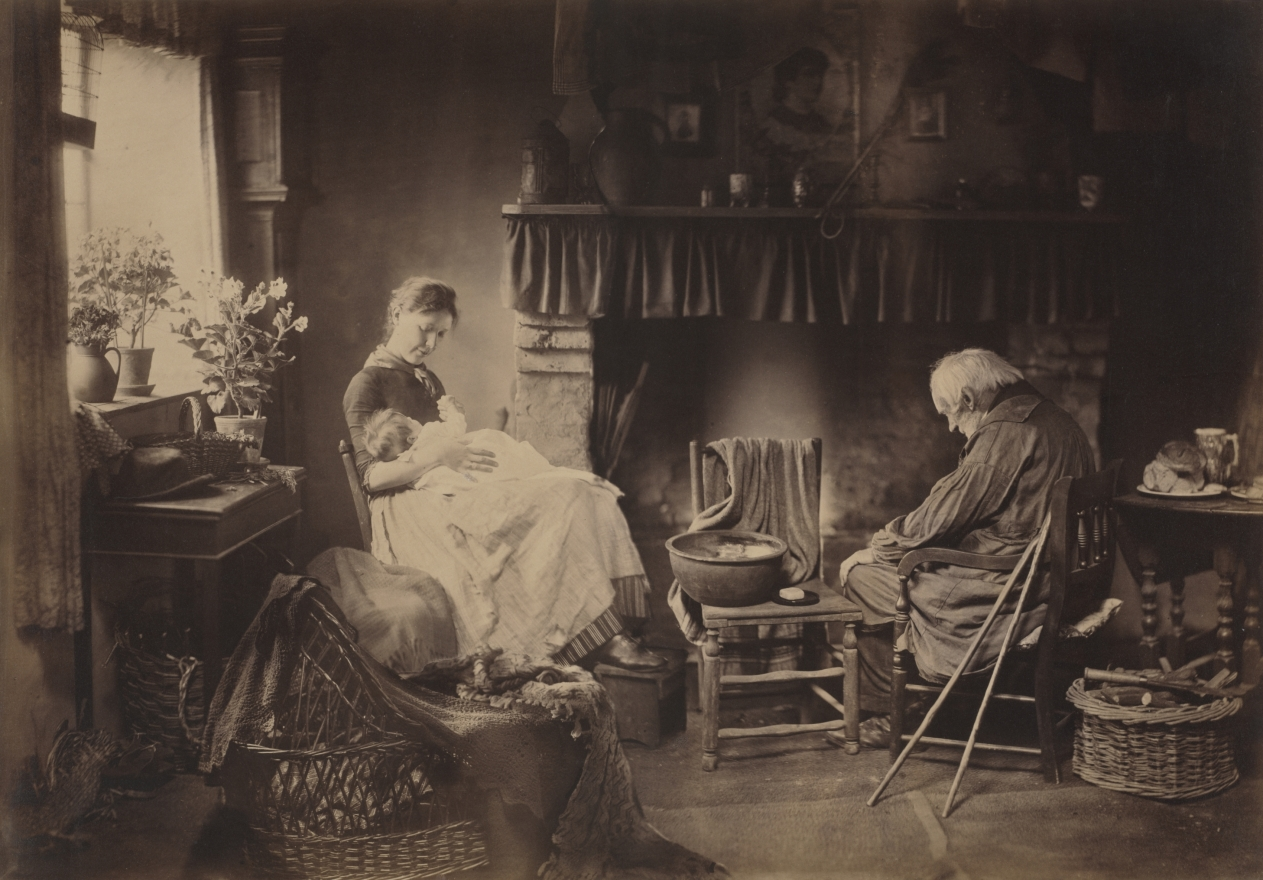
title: Dawn and Sunset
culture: England, 19th century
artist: Henry Peach Robinson (British, 1830–1901)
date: 1885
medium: albumen print from three negatives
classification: Photograph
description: Henry Peach Robinson was a pioneer in the "combination printing" technique, employing a number of negatives to make one photographic print. Keenly interested in portraying picturesque narrative scenes and landscapes, he carefully staged elaborate tableaux, often relying on relatives to serve as models. In Dawn and Sunset he presented a symbolic portrayal of three generations, from infancy to old age. By using the combination method, he was able to exercise greater control over his subjects' poses, gestures, and expressions than would have been possible with a single exposure. The smaller, platinum print version provides an instructive example of how an artist's vision can change when a different process is used to print the same negative. The platinum process provided a warmer, more subtle tonal range than the albumen process. The larger, albumen print appears almost journalistic in its use of harsh, even lighting, whereas in the platinum print Robinson was able to hide many details in dark shadow. This created a sense of unity that is missing in the larger image.